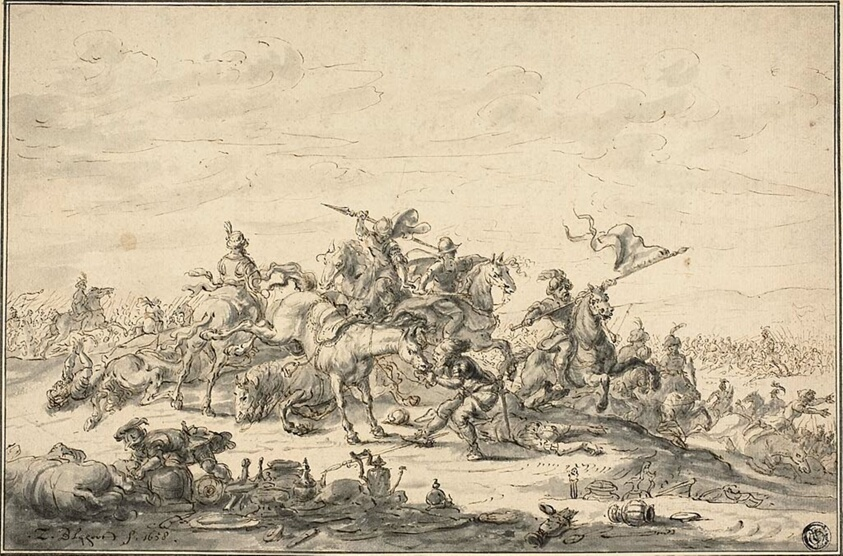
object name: Drawing and Watercolor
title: Battle Scene with Horsemen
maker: Zacharias Blyhooft (Dutch, active 1658/59-1680/82)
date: 1658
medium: Pen and brown ink with brush and gray wash, on ivory laid paper, laid down on card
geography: Holland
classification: pen and ink drawings; drawings (visual works); prints and drawing